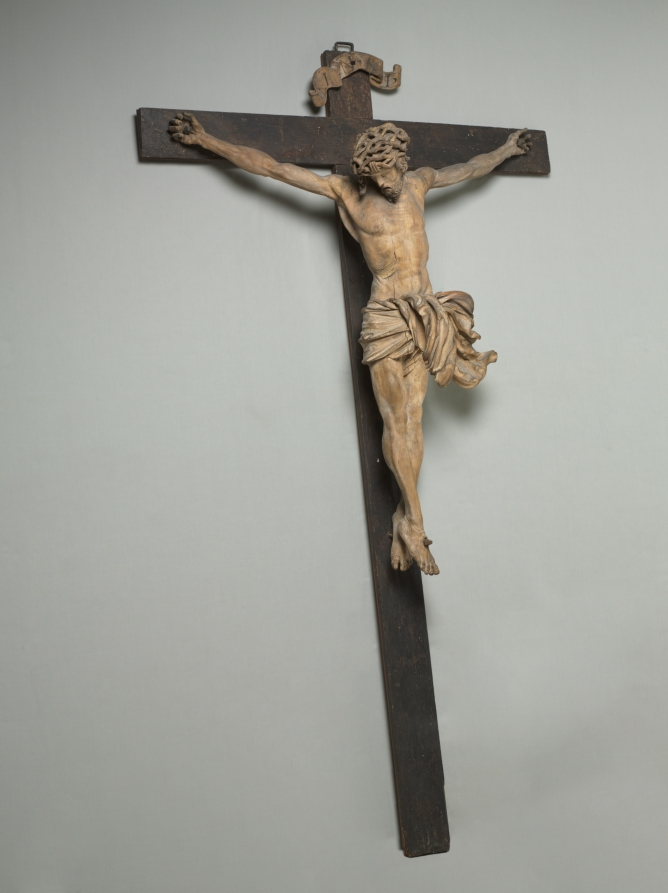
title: Crucified Christ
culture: Germany, Landshut, 16th century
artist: Hans Leinberger (German)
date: c. 1525–1530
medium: lindenwood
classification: Sculpture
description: This sculpture is possibly the best of several crucifixes by this famous sculptor from the Bavarian town of Landshut on the Upper Danube. The pathos and graphic realism with which the artist has modeled the body of Christ ranks this sculpture as one of the artist’s finest works. Leinberger was, along with Matthäus Krennis, an outstanding exponent of the late Gothic style pervasive throughout the Upper Danube area of southeastern Germany during the first decades of the 1500s. This sculpture was probably suspended over the main altar of a church whose origins have not been identified.